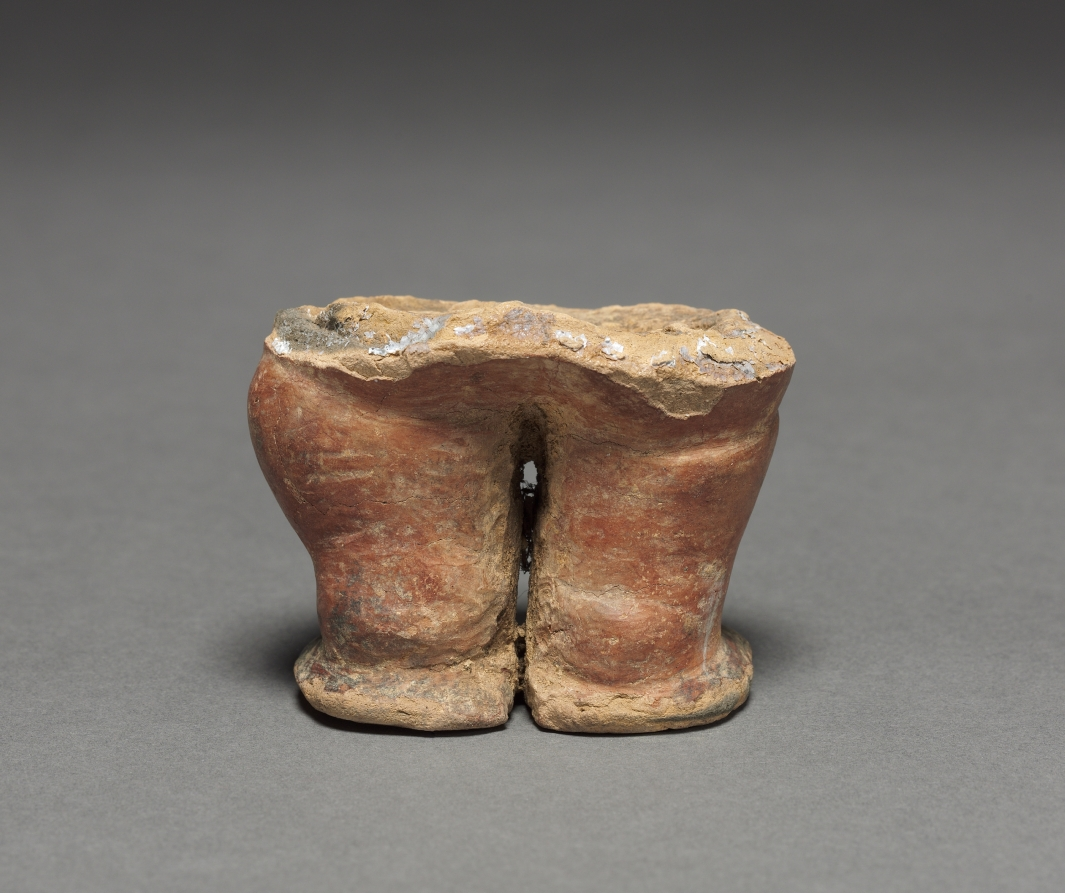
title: Jar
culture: Colombia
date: before 1550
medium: black ware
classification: Ceramic